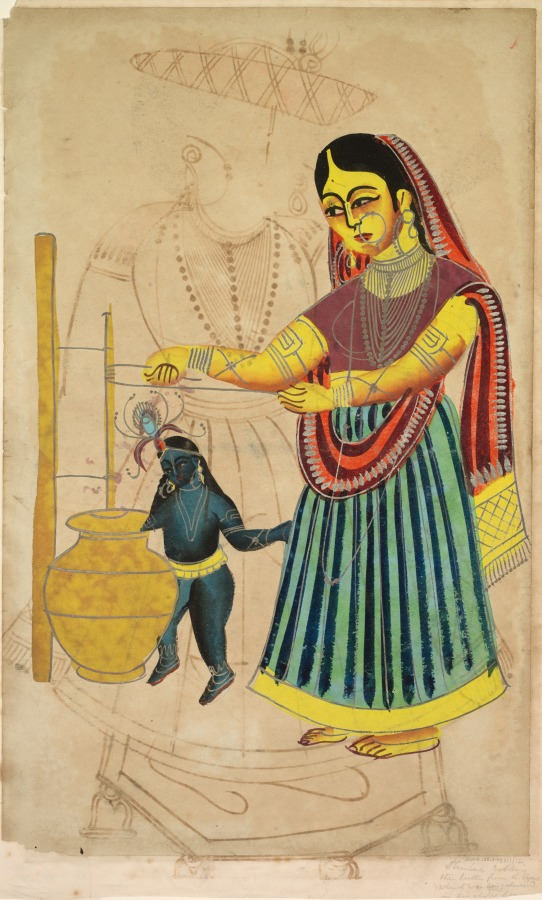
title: Yasoda Churning Butter (verso), from a Kalighat album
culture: Eastern India, Bengal, Kolkata, Kalighat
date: c. 1890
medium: Gum tempera, graphite, ink, and tin on paper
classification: Painting